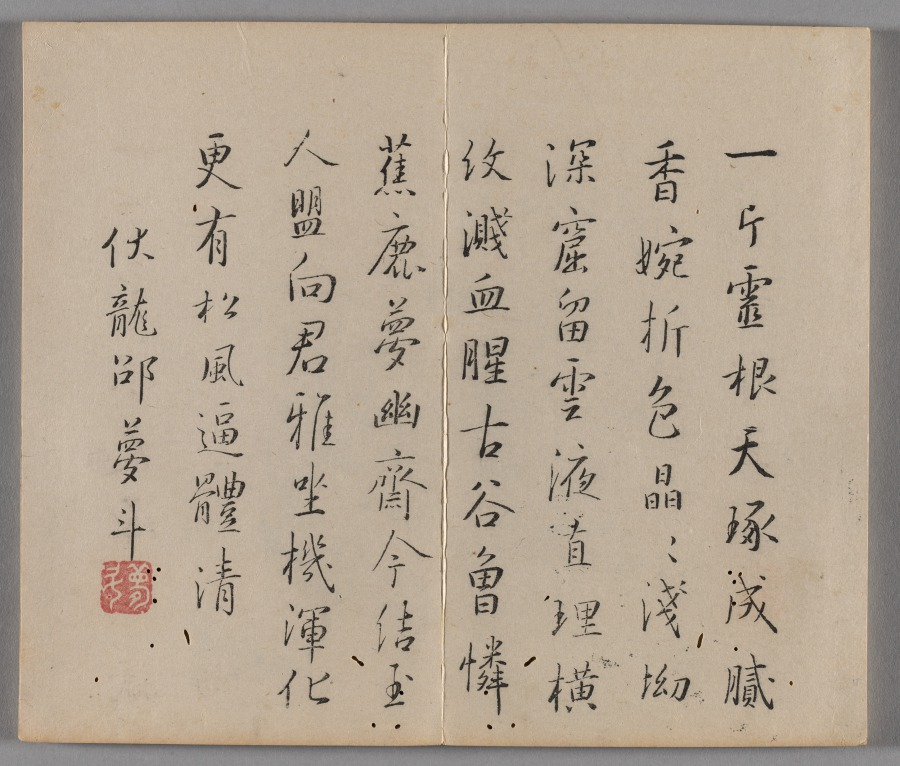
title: Ten Bamboo Studio Painting and Calligraphy Handbook (Shizhuzhai shuhua pu): Rocks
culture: China, Qing dynasty (1644-1911)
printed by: Hu Zhengyan (Chinese, c. 1584–1674)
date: 1633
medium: Woodblock-printed book; ink and colors on paper; first edition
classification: Print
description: Color printing reached a level of perfection in the early 1600s, as seen in this Ten Bamboo Studio Collection of Calligraphy and Painting and the Mustard Seed Garden Manual of Painting (printed 1679 and 1701). The painterly quality, precision in registering (aligning) the woodblocks, and harmonious colors made them the most successful color print editions in Chinese history. Both editions were printed and compiled in Nanjing, spread nationwide, and had a great impact on the arts in Japan and Korea.